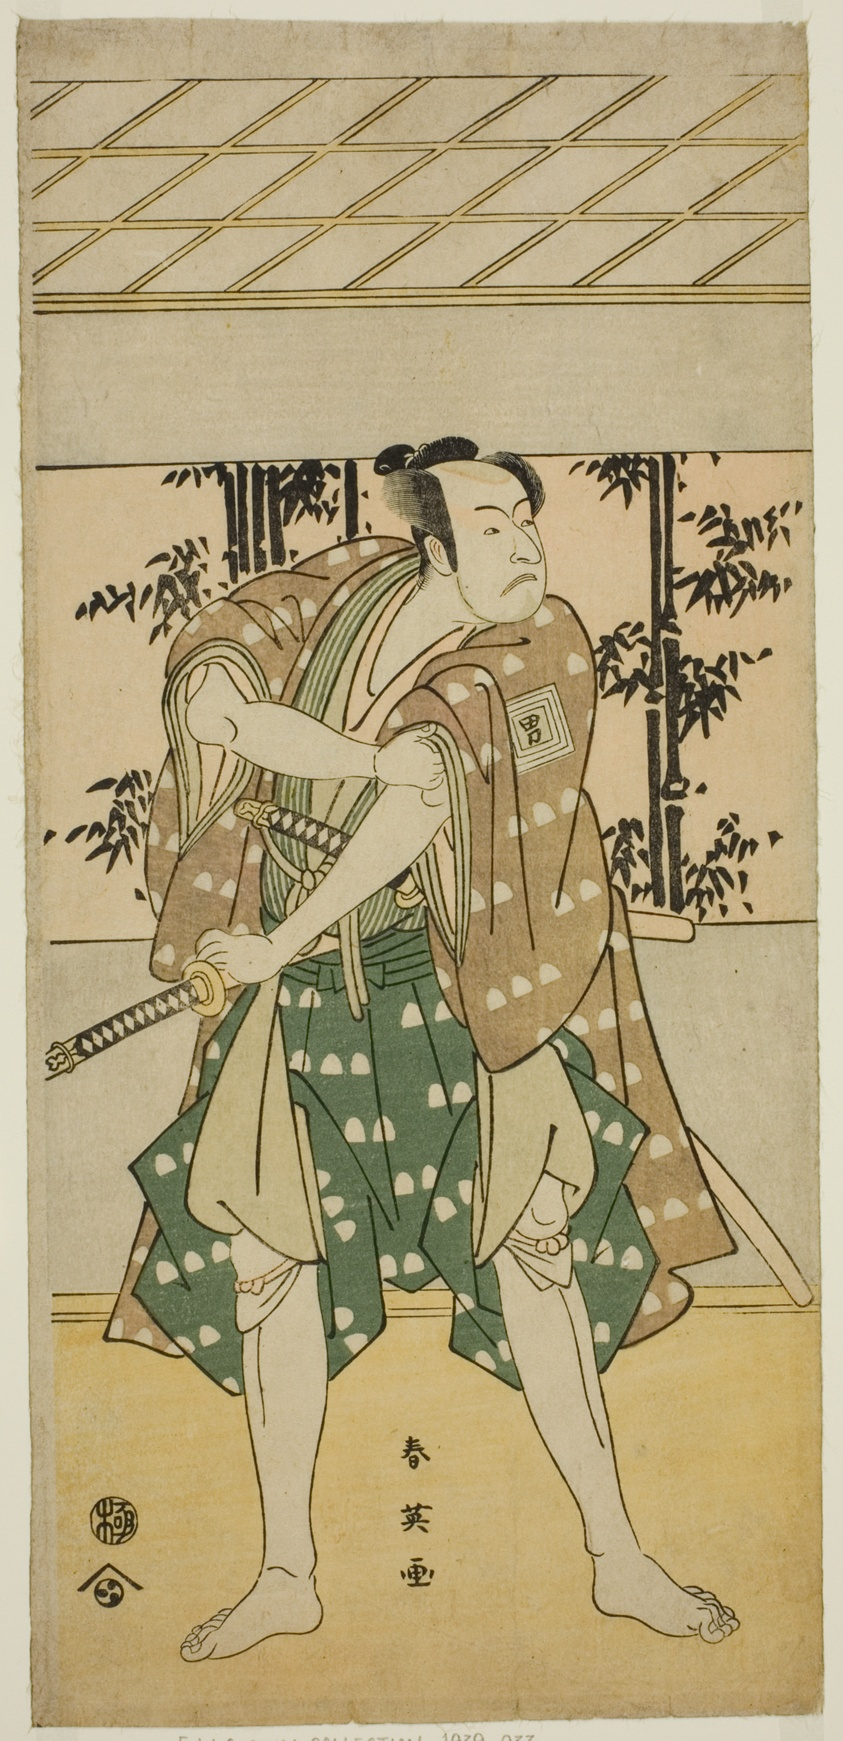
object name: Print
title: The Actor Ichikawa Omezo I as the Boatman Takihei (?) in the Play Ofunamori Ebi no Kaomise (?), Performed at the Kawarazaki Theater (?) in the Eleventh Month, 1792 (?)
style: Japanese (culture or style)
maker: Katsukawa Shun'ei (Japanese, 1762-1819)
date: c. 1792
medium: Color woodblock print; hosoban; left sheet of diptych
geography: Japan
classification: woodblock print; print; asian art